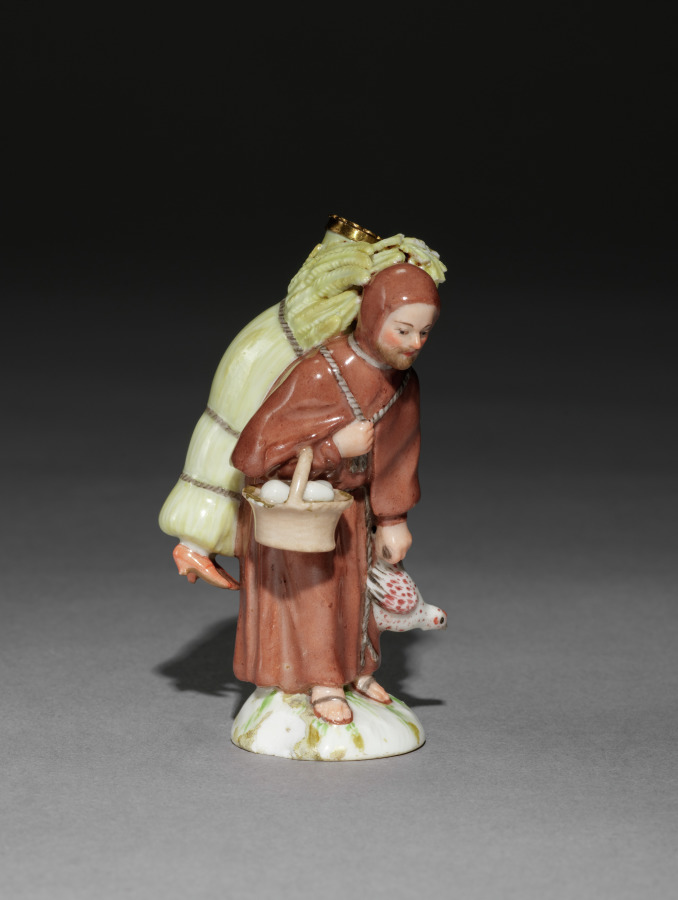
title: Scent Bottle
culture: Germany, Berlin, 18th century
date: 1780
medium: porcelain with gilt metal mounts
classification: Miscellaneous